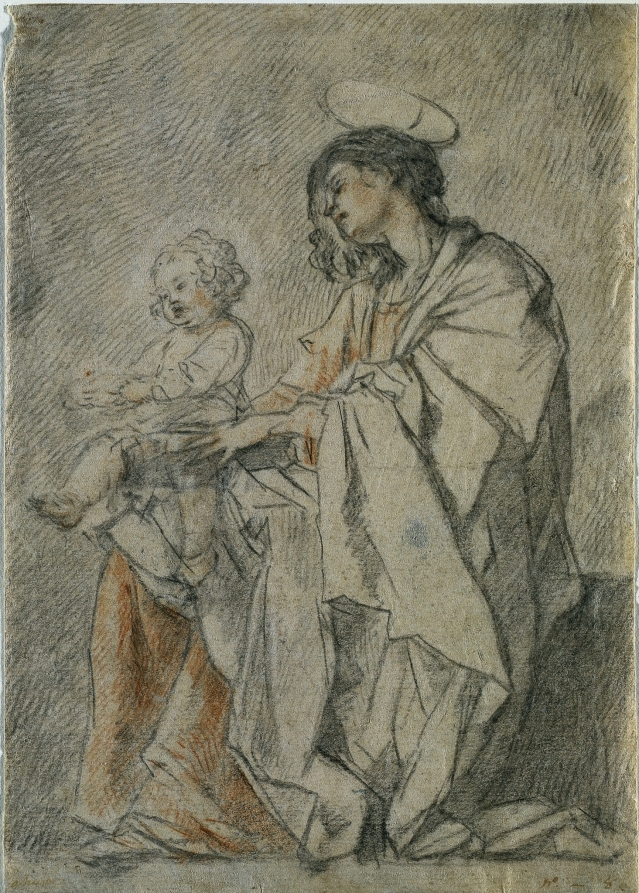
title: Virgin and Child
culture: France, 17th century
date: 1600s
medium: black and red chalk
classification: Drawing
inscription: lower left, in brown ink: la hyre ; lower right, in brown ink: no. - 8 ; VERSO, lower right, in graphite: #34 ; SECONDARY SUPPORT (now removed), upper left, in graphite: 86 [sideways] ; lower left, in graphite: Vincent [Romano?] ; lower left, in graphite: Nr. 51. ; lower left, in graphite?: [illegible, erased] ; lower center, in graphite: Laurentius de La Hire. / 1606-56. ; VERSO, center, in brown ink: V[illegible] Romano